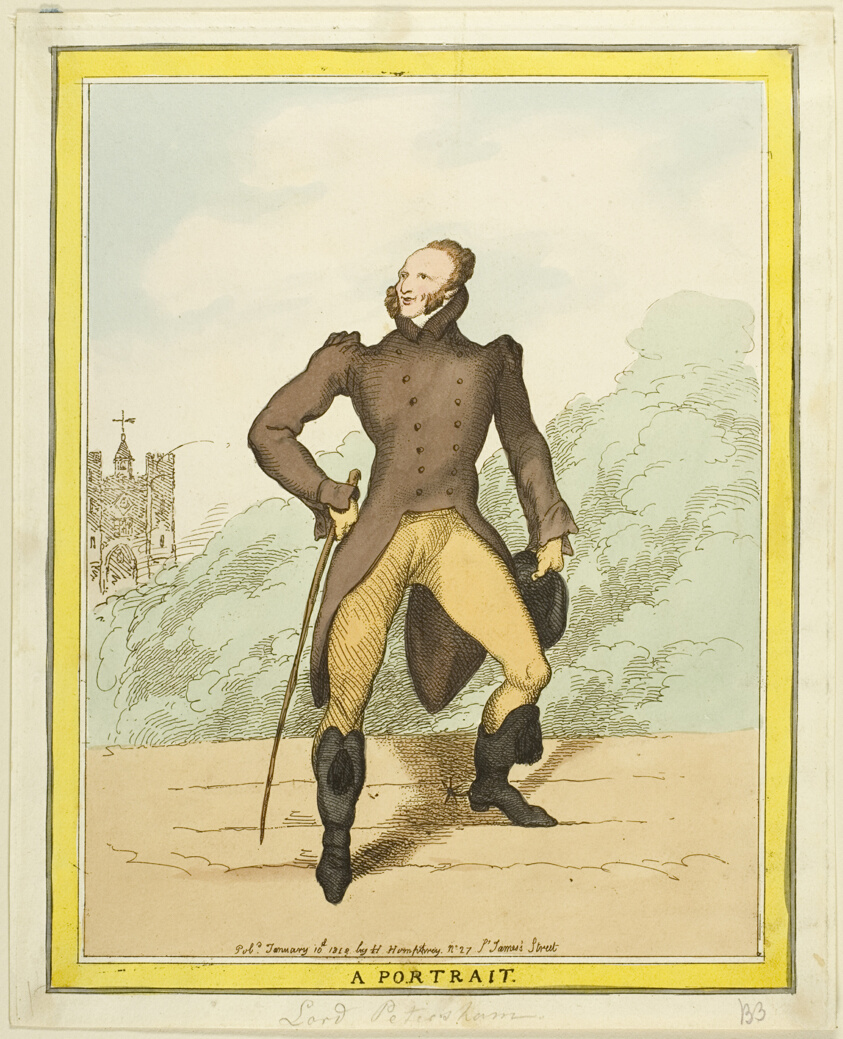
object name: Print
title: A Portrait: Lord Petersham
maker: Thomas Rowlandson (English, 1756-1827); published by Hannah Humphrey (English, 1745-1818) and Thomas Tegg (English, 1776-1845)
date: published January 10, 1812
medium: Hand-colored etching on ivory wove paper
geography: England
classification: etching; print; prints and drawing